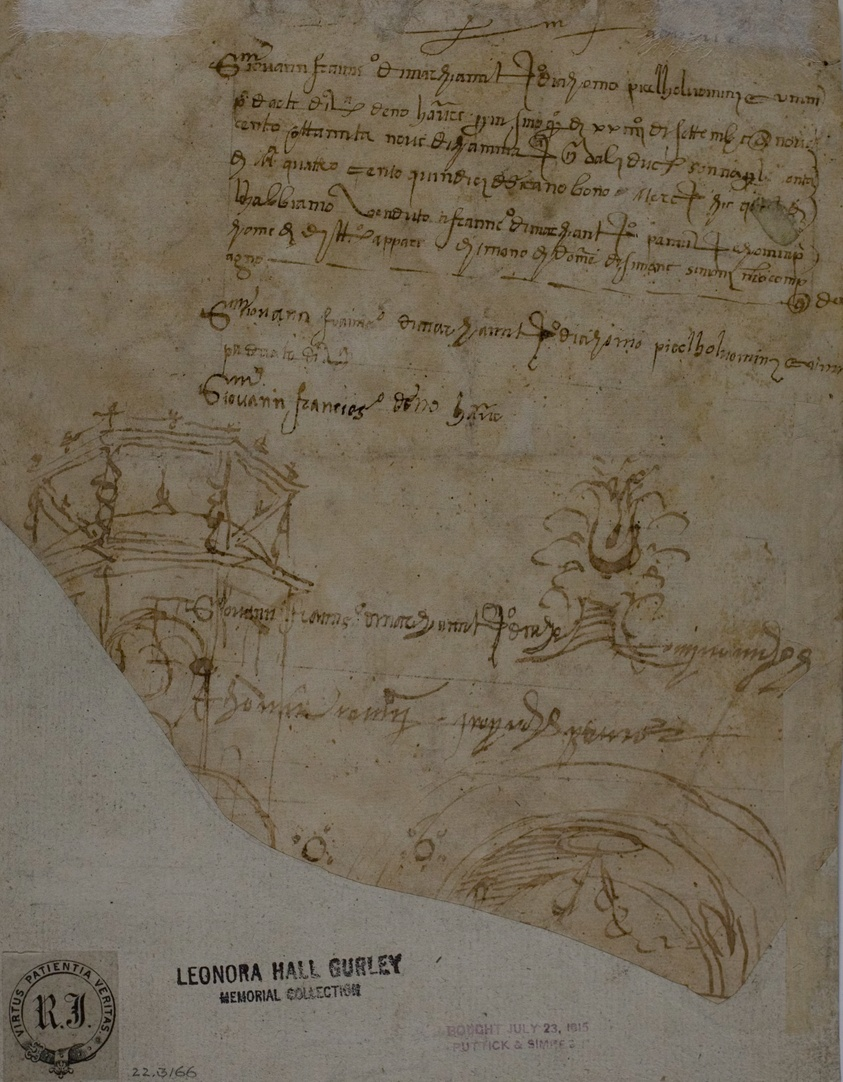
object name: Drawing and Watercolor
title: Head of a Bearded Man (recto) Sketches of Architectural Details (verso)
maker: Unknown Artist; Italian, early 16th century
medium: Red chalk (recto) and pen and brown ink (verso) on buff laid paper, pieced and laid down on buff laid paper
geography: Italy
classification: chalk; drawings (visual works); prints and drawing